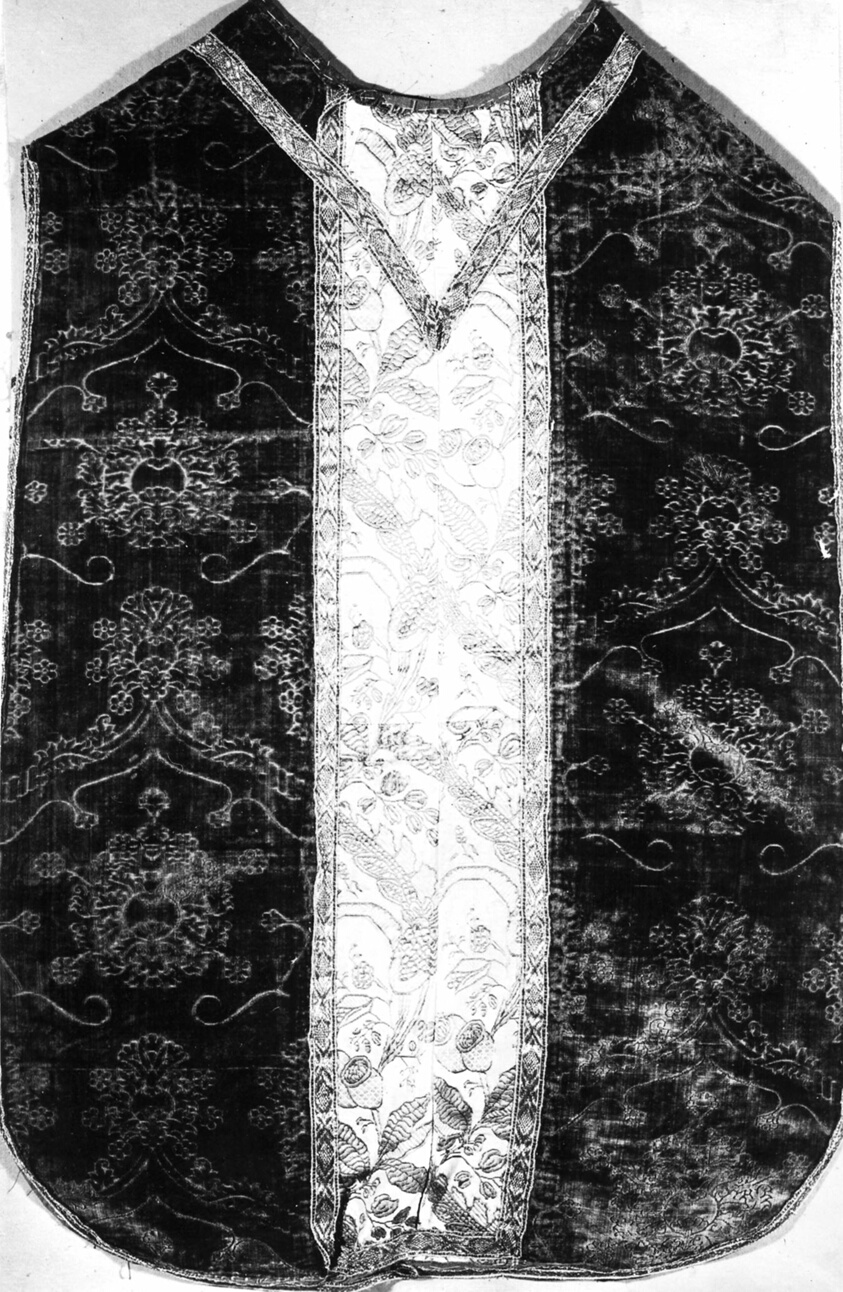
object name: Textile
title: Chasuble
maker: Italy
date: 1475/1500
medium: Silk, warp-float faced 4:1 satin weave with supplementary pile warps forming cut voided velvet; Orphrey: silk, plain weave with supplementary patterning warps; edged with gilt-metal strip and gilt-metal-strip-wrapped linen, plain weaves self-patterned by main warp floats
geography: Italy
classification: textile; weaving; costume; liturgical; weaving - velvet